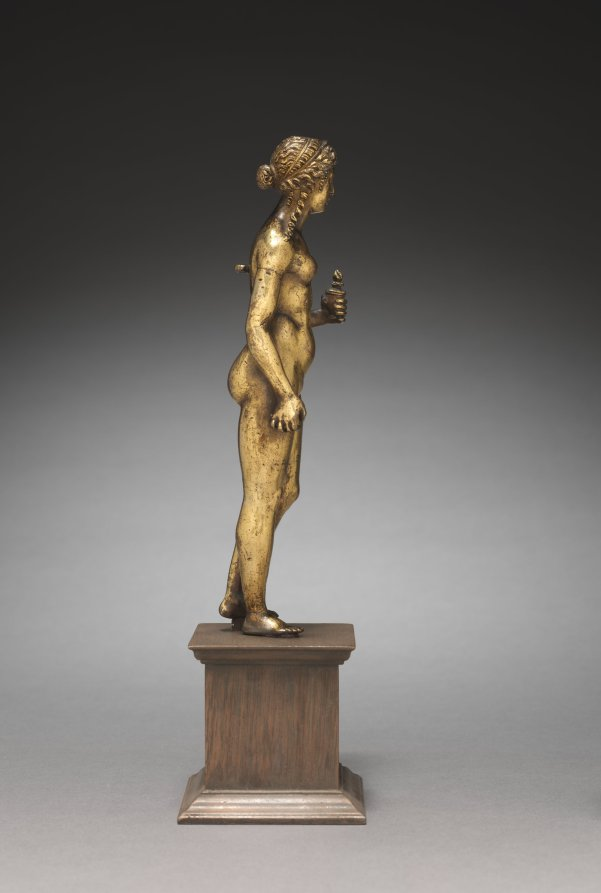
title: Venus with a Burning Urn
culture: Northern Italy, 16th century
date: c. 1500–1520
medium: gilt bronze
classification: Sculpture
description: Venus is the Roman goddess of many virtues, including Love, Charity, Fertility, and Victory. Here, Venus is represented as the goddess of Charity. She wears a crown, as Charity is often depicted as the Queen of the Virtues. The flaming lamp in Venus's left hand was also a symbol of Charity in Venice, where this piece is thought to have originated. The bent fingers of her right hand are bent suggest that Venus may have once held another object. Renaissance sculptors often looked back to antiquity when producing monumental and small bronze statues. The small bronze cabinet piece comes into Italian art during this time, bringing ancient gods and goddesses into Italian households. Venus stands in a contrapposto pose and, like Hellenistic and Roman objects, her locks are tied by a double ribbon while two curls fall on her shoulders. Her tilted head and large emotional eyes, as well as her small nose and parted lips reflect the influence of Hellenistic Greek facial styles.